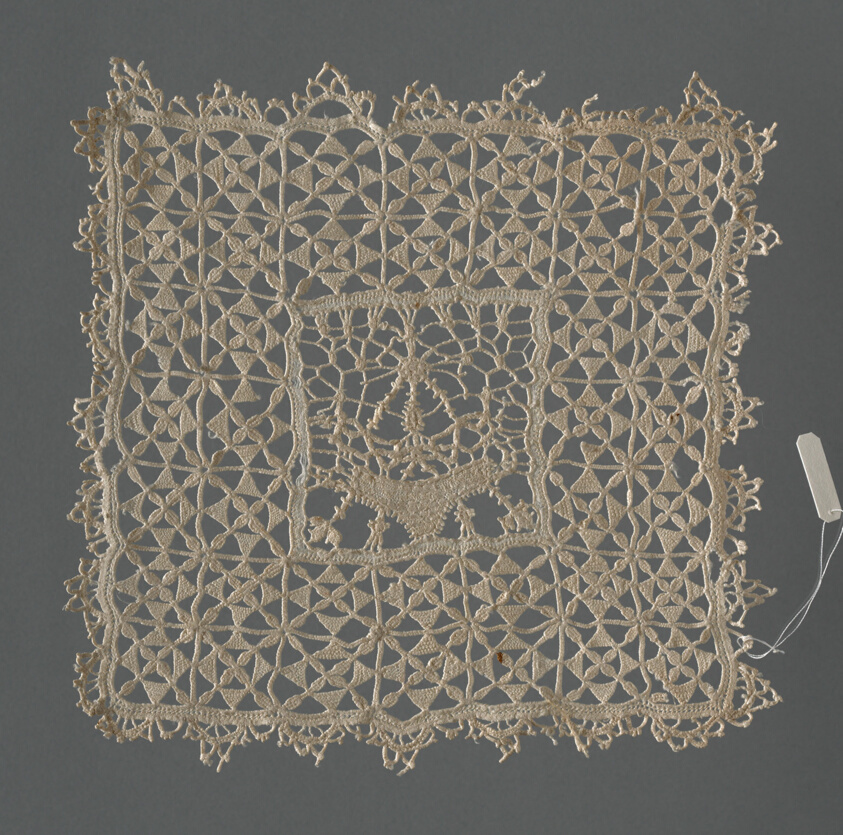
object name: Religious/Ritual Object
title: Chalice Cover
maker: Italy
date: 1601/25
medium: Linen, needle lace worked on a plain weave cut and drawn thread grid; embroidered in antique hem, double hem, and overcast stitches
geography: Italy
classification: textile; lace - needle; ritual objects